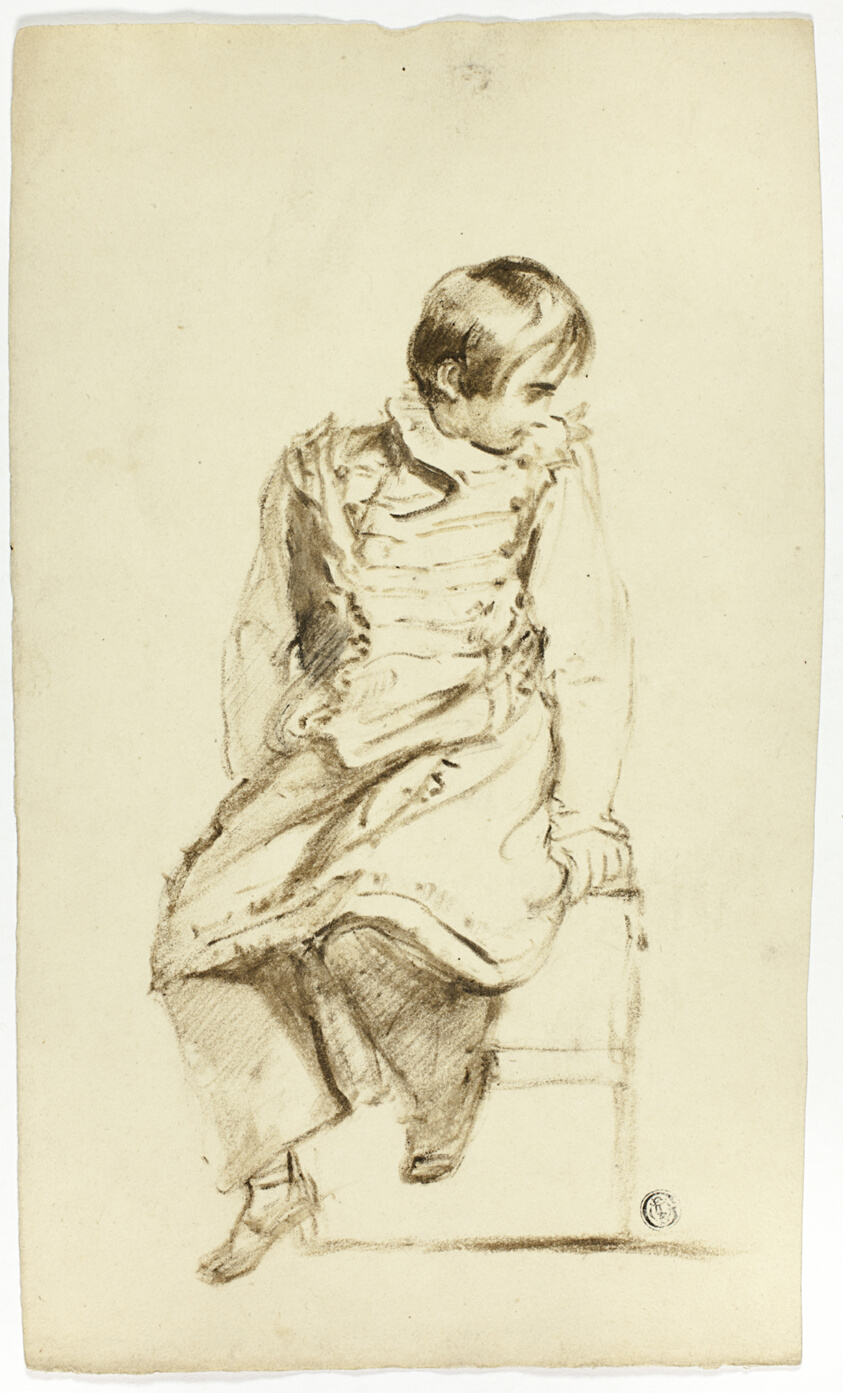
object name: Drawing and Watercolor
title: Seated Boy, Looking Sideways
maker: Thomas Jones Barker (English, 1815-1882); or Thomas Barker (English, 1769-1847)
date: c. 1830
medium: Bistre crayon on cream wove paper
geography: England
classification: drawings (visual works); crayon; paper; prints and drawing